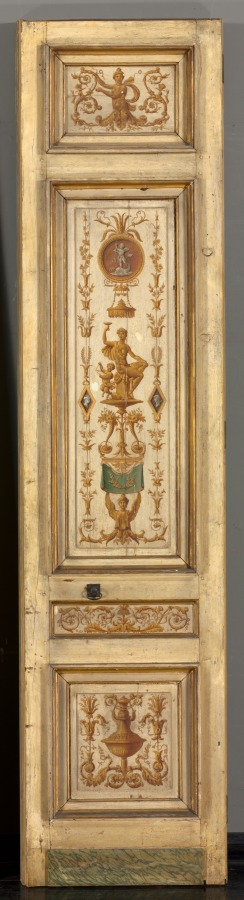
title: Double-leaf Doors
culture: France, 18th century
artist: Pierre Rousseau (French, 1751–1829)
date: 1790s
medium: oil on wood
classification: Painting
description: Shifts in style and taste often result in changes to original architectural details. Rousseau painted these doors with imitation dark wood grain. Another craftsman later scraped off the dark color surrounding the classical designs. This set was conserved in 1979 and retains more traces of the original graining than the other doors by this artist in the museum's collection.